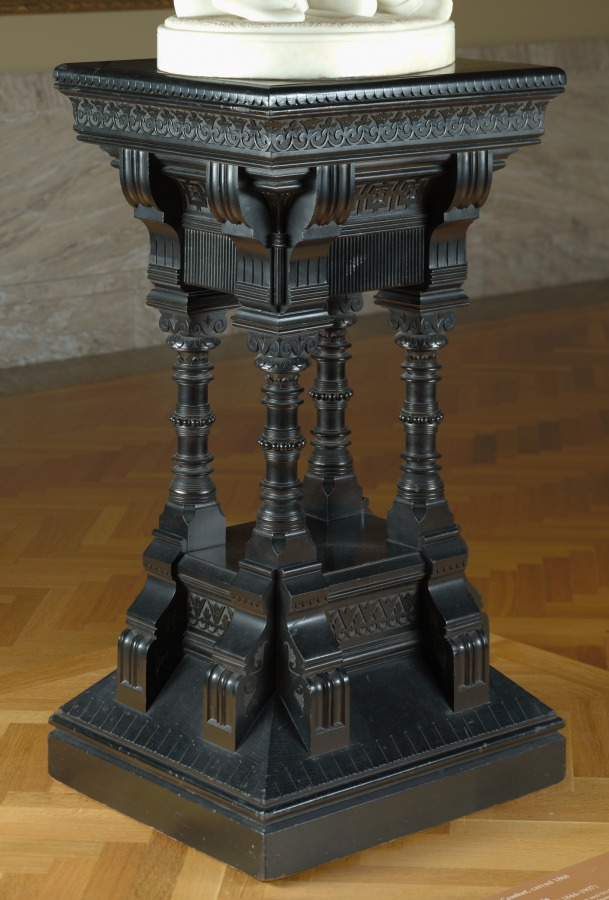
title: Pedestal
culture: America, Pennsylvania, Philadelphia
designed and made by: attributed to Daniel Pabst (American, 1826–1910)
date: c. 1870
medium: ebonized cherry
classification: Furniture and woodwork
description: The pedestal of of ebonized (stained black) wood was made under the stylistic influence of the Philadelphia architect Frank Furness (1839-1912).